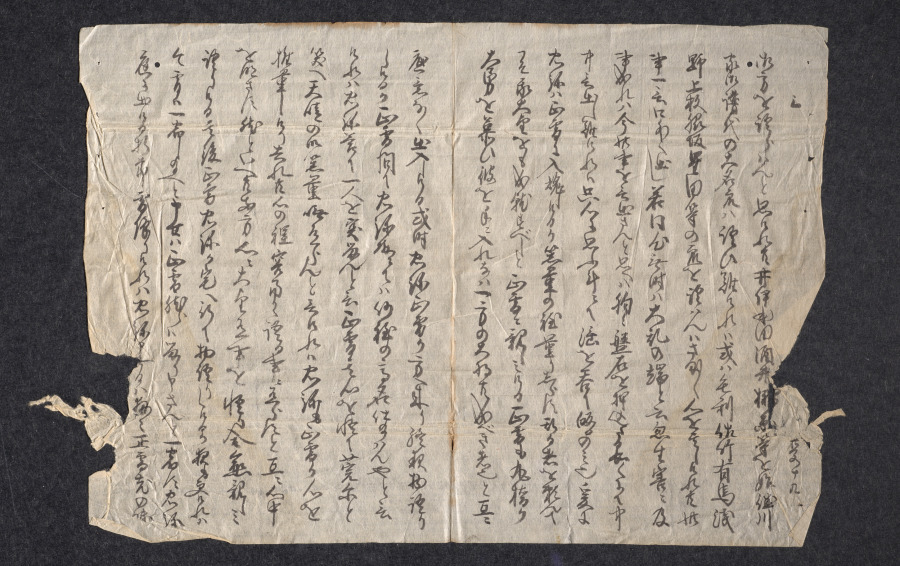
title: Coastal Landscape in the Haboku Style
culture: Japan, Muromachi period (1392–1573)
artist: Keison (Japanese, active late 15th to early 16th century)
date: late 1400s–early 1500s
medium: hanging scroll, ink on paper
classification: Painting